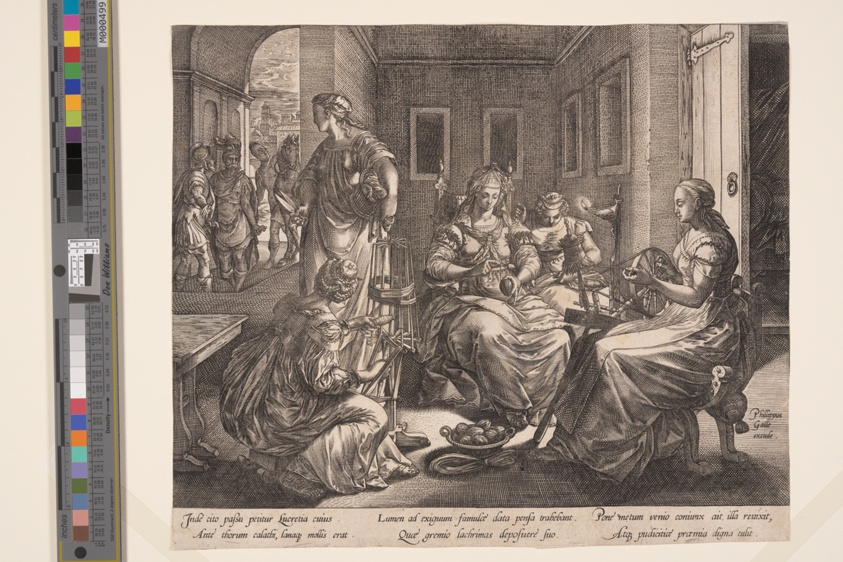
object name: Print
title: Lucretia and her Women Spinning, from The Story of Lucretia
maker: Hendrick Goltzius (Dutch, 1558–1617)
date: 1578–79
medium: Engraving on laid paper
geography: Netherlands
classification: print; engraving; paper; prints and drawing